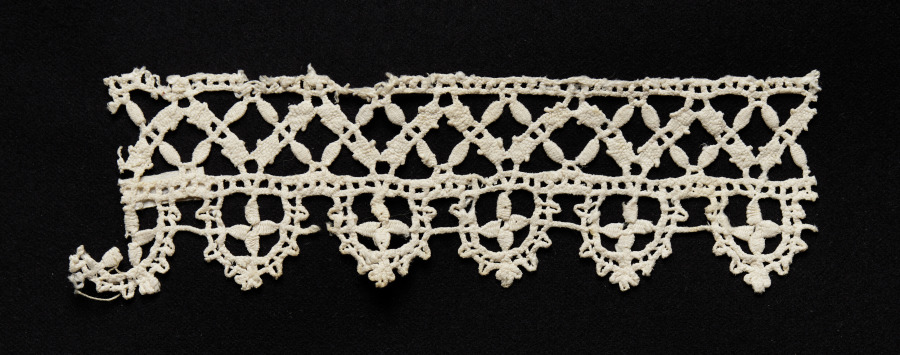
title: Lace Insertion and Edging of Points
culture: Italy, Genoa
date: 1550–99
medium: Bobbin lace (needle lace, reticella design)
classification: Lace